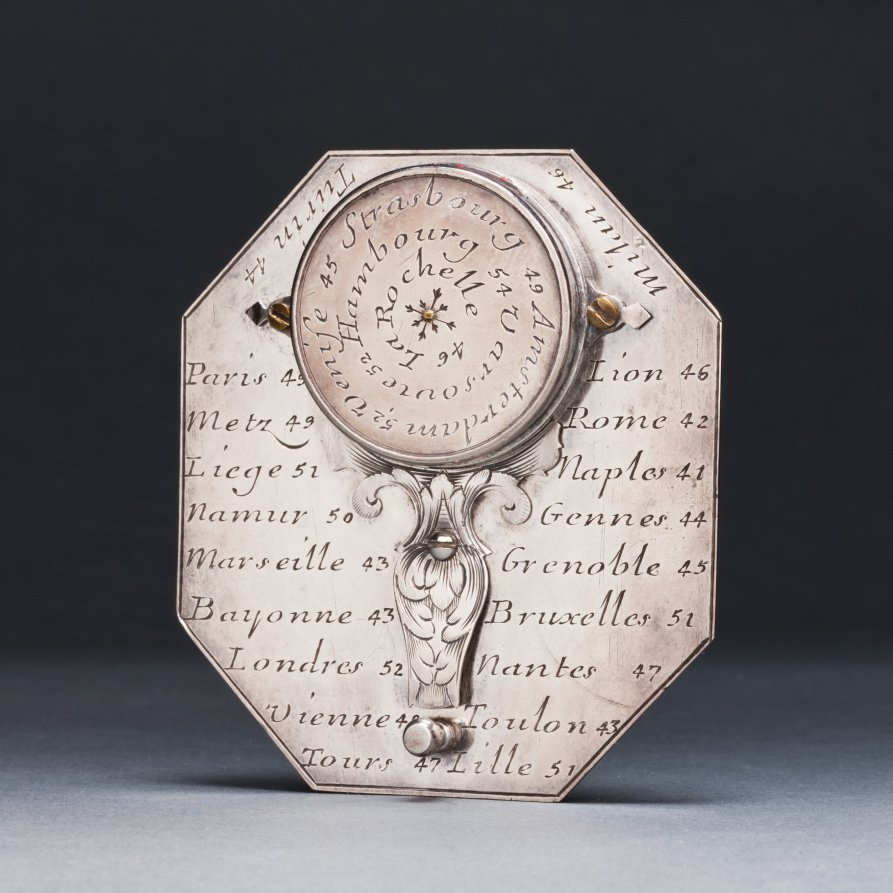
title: Butterfield Sundial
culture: France, 18th century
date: 1700s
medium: silver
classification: Silver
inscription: [Engraved signature above the compass in ribbon band]: "N. BION A Paris"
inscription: [Engraved on the face of the sundial]: “Pour 55° 4-5-6-7-8-9-10-11 50° IIII-V-VI-VII-VIII-IX-X-XI 45° 5-6-7-8-9-10-11 40° -VI-VII-VIII-IX-X-XI'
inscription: [Engraved on the other side]: "Pour 55° -8-7-6-5-4-3-2-1-0 50°-VIII-VII-VI-V-IIII-III-II-I 45°-8-7-6-5-4-3-2-1 40°-VII-VI-V-IIII-III-II-I"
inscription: [Engraved around the compass]: “NORD-OUEST-SUD-EST”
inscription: [Engraved on the back of the sundial]: “Turin 44 Milan 46 Paris 49 Lion 46 Metz 49 Rome 42 Liege 51 Naples 44 Namur 50 Gennes 44 Marseille 43 Grenoble 45 Bayonne 43 Bruxelle 51 Londres 52 Nantes 47 Vienne 48 Toulon 43 Tours 47 Lille 51”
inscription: [Engraved around the back of the compass]: “Venise 45 Strasbourg 49 Amsterdam 52 Hambourg 54 Varsovie 52 La Rochelle 46”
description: Butterfield-type sundials are characterized by their adjustable gnomons, metal flaps that cast a shadow on the dial’s face to indicate the hour, and geographical indices. This sundial has a scale adjustable between latitudes of 40° to 60° north. The latitudes of 26 European towns are engraved on its back for quick reference. With an intricately engraved silver face, it would have functioned as a fashionable traveler’s accessory.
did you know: Butterfield-style sundials were named after Micheal Butterfield, an English scientific and mathematical instrument maker who worked in Paris between 1674 and 1724.